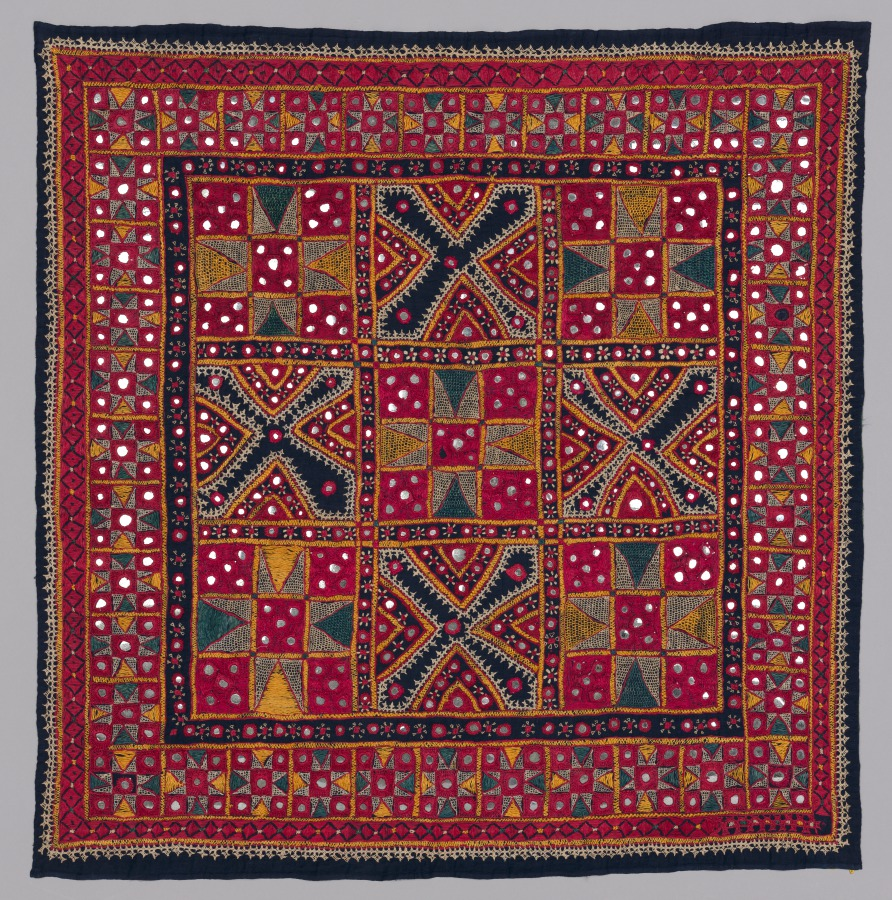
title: Chakla: Cloth used to Wrap Articles of Bride's Dowry, or as a Hanging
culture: India, Kathiawar, 19th century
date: 1800s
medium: embroidery; cotton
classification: Embroidery